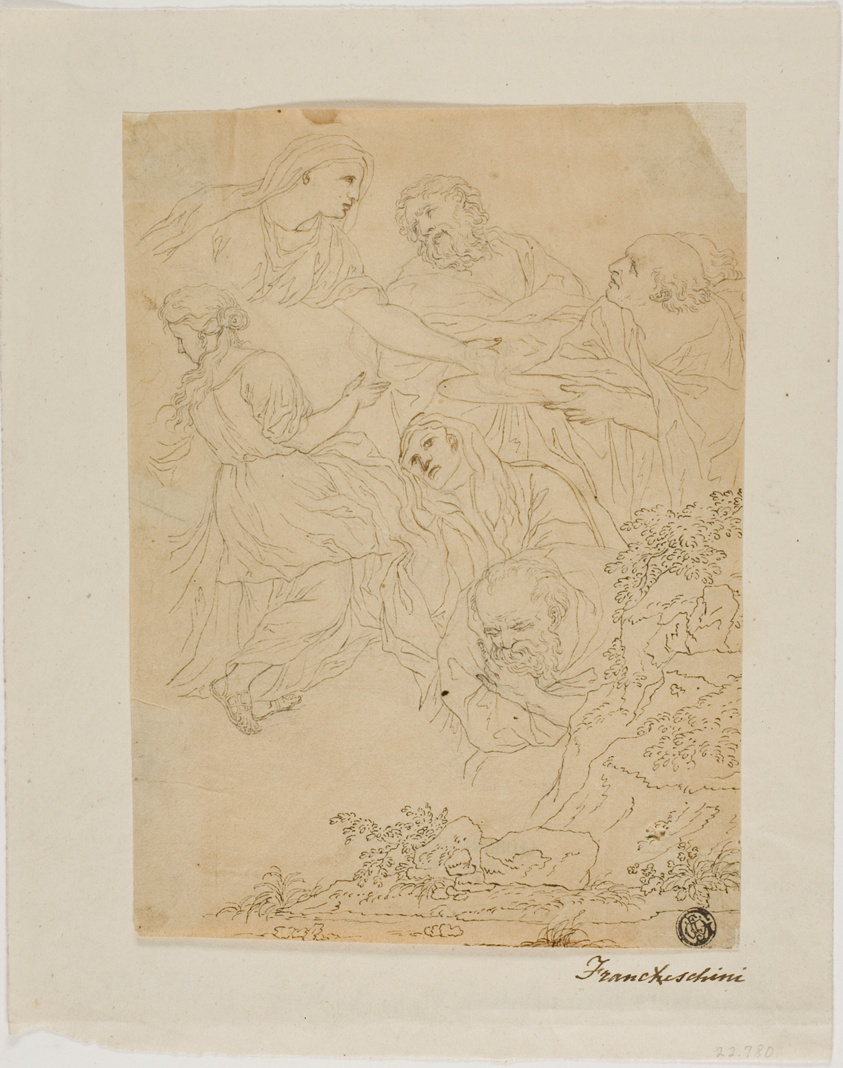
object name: Drawing and Watercolor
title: Sketches of Figures, Landscape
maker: Possibly after Marco Antonio Franceschini; Italian, 1648-1729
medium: Pen and brown ink, over traces of graphite, on tan laid paper, tipped onto cream wove paper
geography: Italy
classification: pen and ink drawings; drawings (visual works); prints and drawing